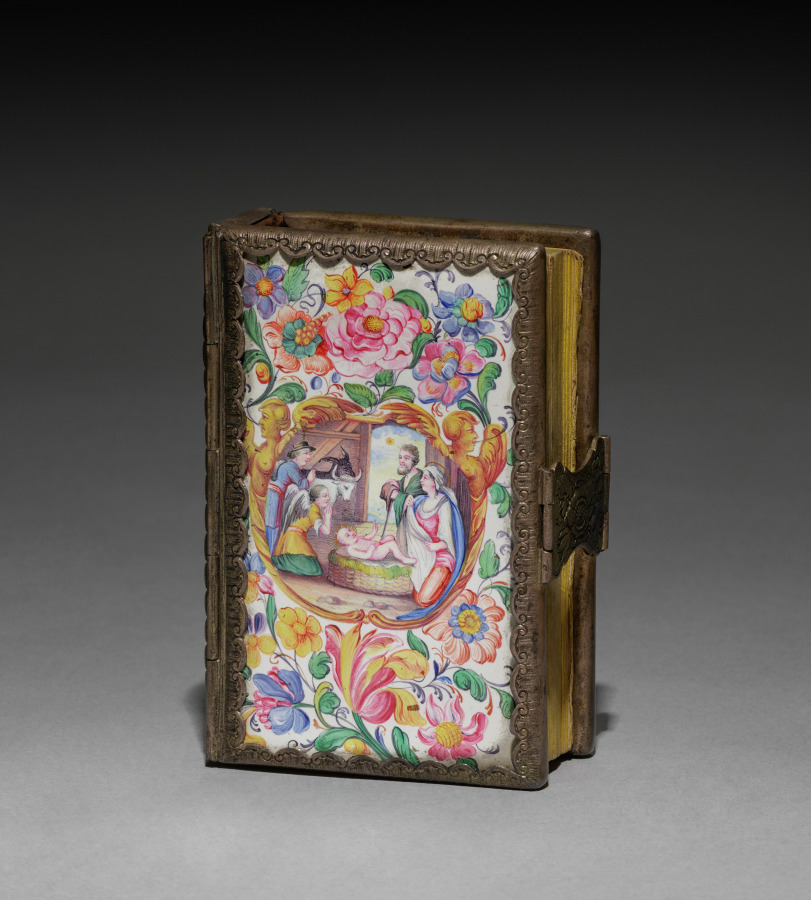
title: Carnet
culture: Sweden, 19th century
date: 1863–1865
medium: enamel on copper and silver gilt book binding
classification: Miscellaneous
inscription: inside is psalm book written in German, with handwritten dedication on cover, dated 25 May 1865.